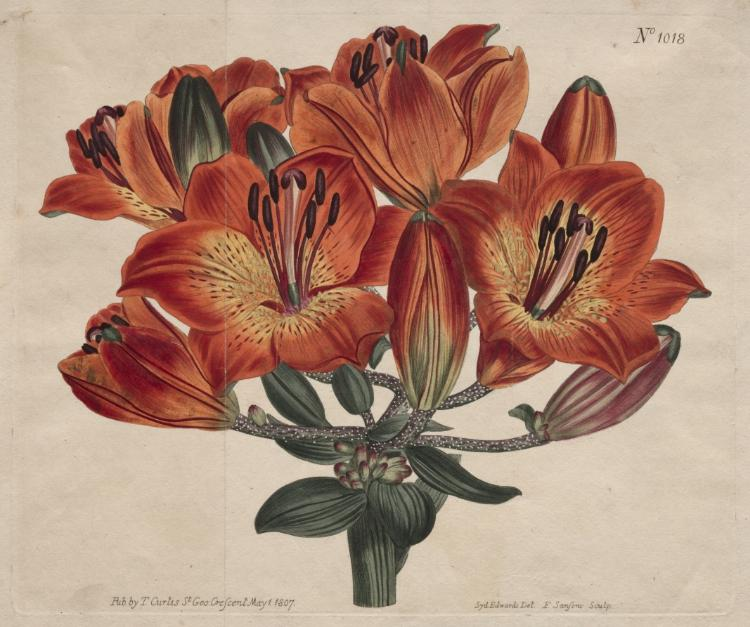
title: The Botanical Magazine or Flower Garden Displayed: Umbel-Flowering Bulb-Bearing Orange-Lily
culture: England, 19th century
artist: Thomas Curtis (British, 1846–1920)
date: 1807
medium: engraving, hand-colored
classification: Print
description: England was central to botanical concerns in the 18th century. For example, Kew Gardens was founded in 1721 and became a major institution for knowledge about plants from every continent. Interest in gardening led William Curtis to found the specialized magazine Botanical Magazine: or Flower Garden Displayed in 1787. Curtis aimed “to illustrate and describe the most ornamental flowering plants including information on their cultivation and illustrations drawn from living plants and colored as near to nature as the imperfection of color will admit.”